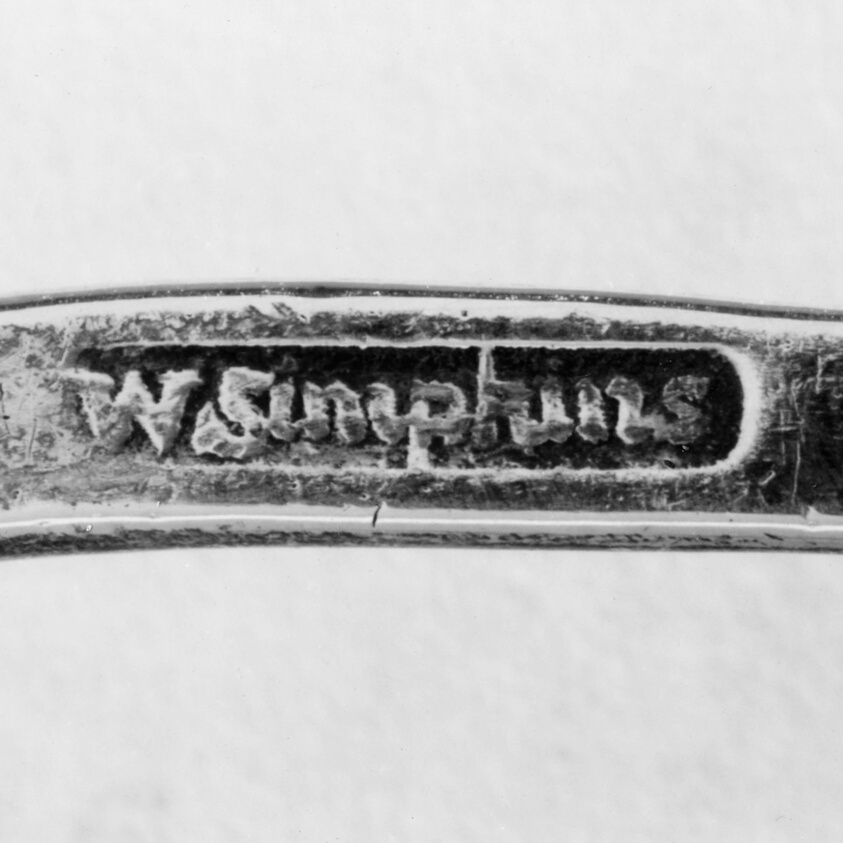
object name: Metalwork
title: Punch Strainer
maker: William Simpkins; American, 1704–1780; Boston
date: 1743–60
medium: Silver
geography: Boston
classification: utensil for serving food; utensil; silver; american decorative arts; american arts; decorative arts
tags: dining, drinking